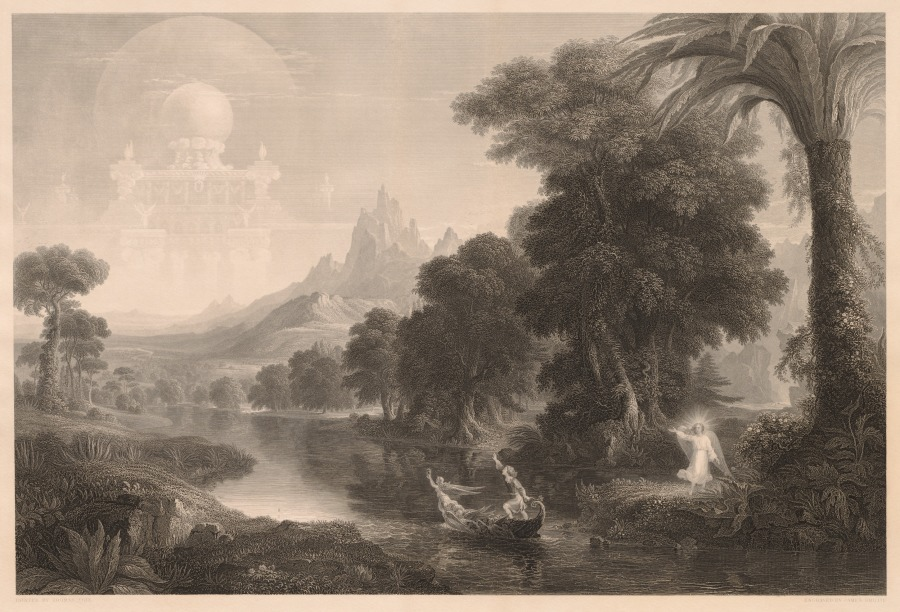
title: The Voyage of Life: Youth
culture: America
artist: James Smillie (American, 1807–1885)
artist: after Thomas Cole (American, born England,1801–1848)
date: 1855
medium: engraving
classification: Print